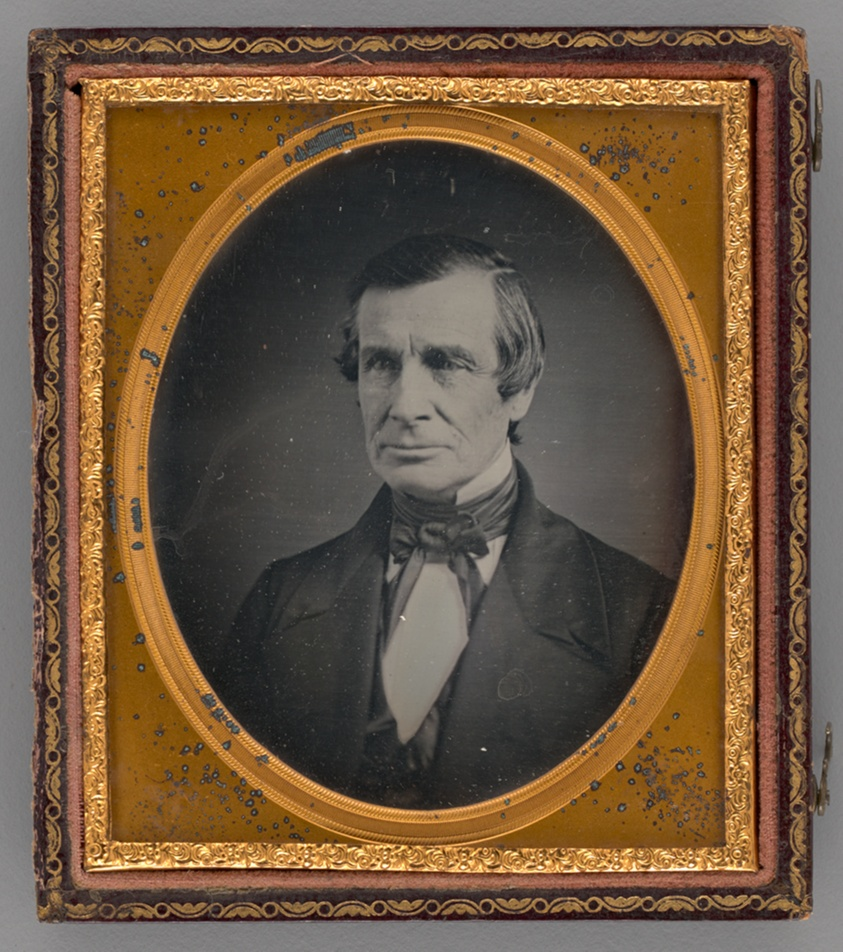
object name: Photograph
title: Untitled (Charles Coit)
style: 19th century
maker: attributed to S. L. Holman; American, 19th century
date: c. 1855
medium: Daguerreotype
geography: United States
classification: portrait; photograph; photographic process; photography; portrait; daguerreotype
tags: lundberg collection, portraits, Male, photography, portrait, portraits: male subject